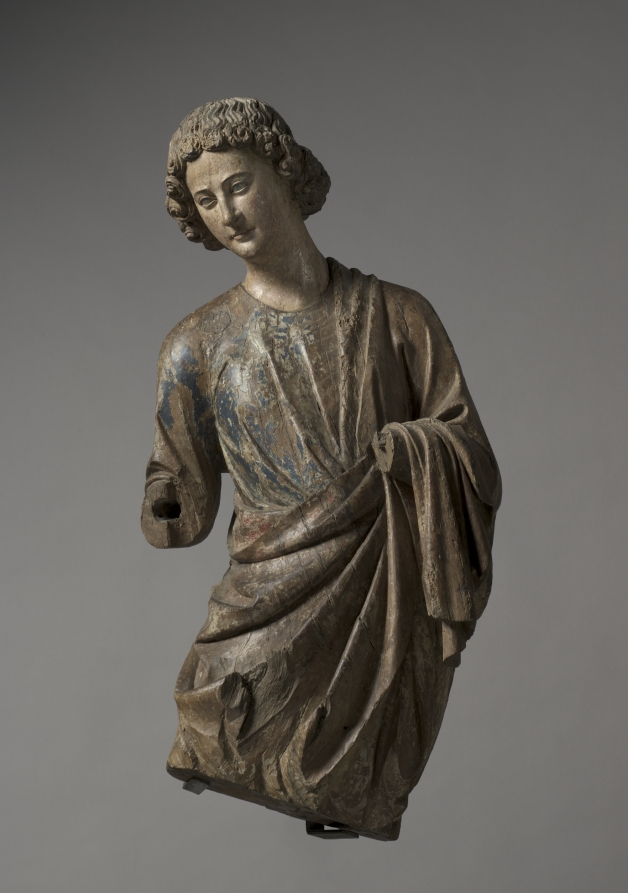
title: Angel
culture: France, vicinity of Reims, 13th century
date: c. 1250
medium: walnut with traces of gilding and polychromy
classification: Sculpture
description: Surviving in fragmentary condition, this pair of angels lacks lower arms, hands, wings, and attributes. Their original paint and gilding, now almost entirely lost, once rendered their garments a rich brocade and their hair a luxuriant gold. Nonetheless, in their graceful poses and sublime faces—which may portray tragic interest, anguish, or deep concern—their original delicacy and power are still evident. They embody the monumental style of 13th-century High Gothic cathedral sculpture in France. Their style specifically suggests they were carved in or around Reims, possibly by sculptors associated with the cathedral there. Their original placement is unknown, but they may have flanked an altar on columns.